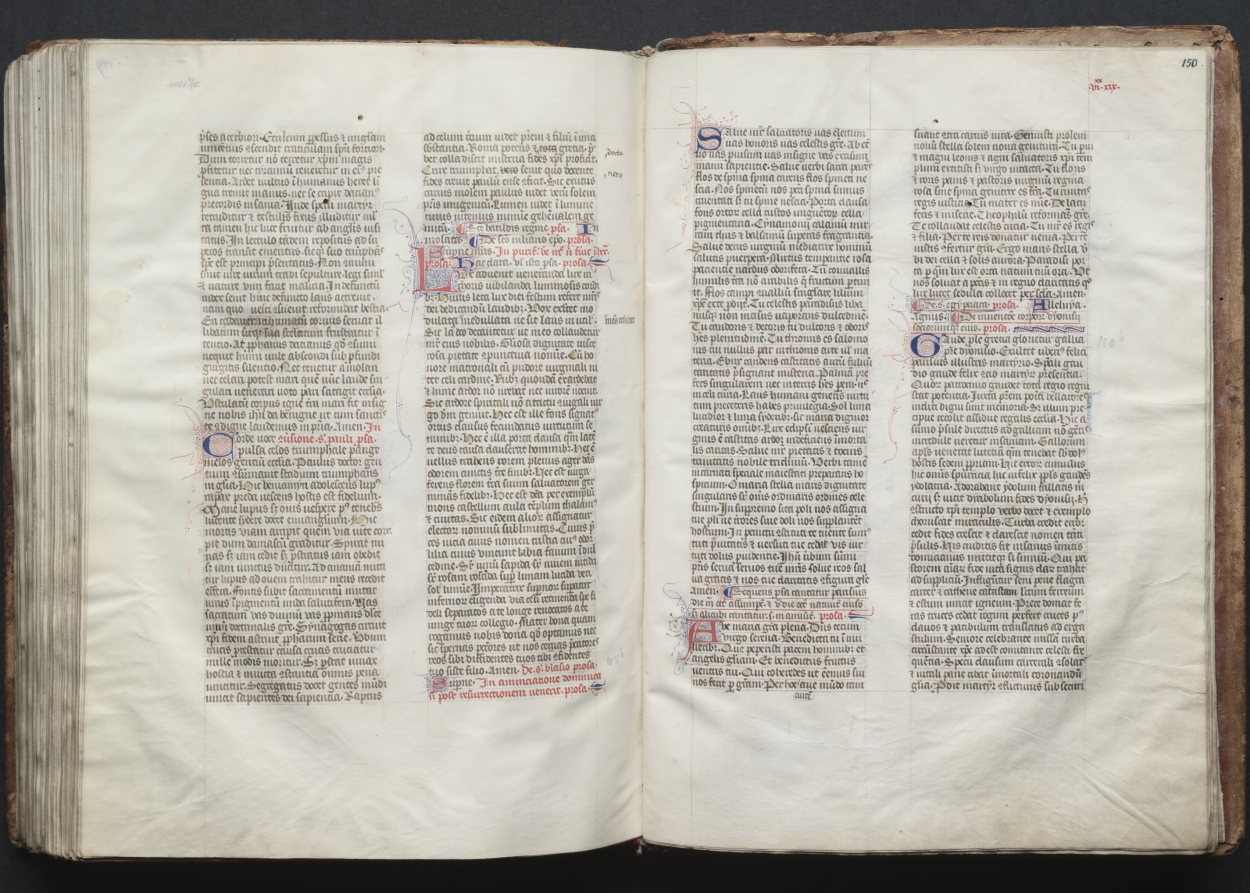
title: The Gotha Missal: Fol. 150r, Text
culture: France, Paris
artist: Master of the Boqueteaux (French)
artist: and Workshop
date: c. 1375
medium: ink, tempera, and gold on vellum; blind-tooled leather binding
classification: Bound Volume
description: The style and quality of this manuscript's decoration is typical of deluxe Parisian books made for aristocratic or royal patrons. Most of the book's decoration appears to be the work of the Master of the Boqueteaux, an artist active at the court of King Charles V (died 1380). His style was apparently shared by a number of book illuminators working in and around Paris. It is very possible that the Gotha Missal belonged to Charles V, but is not provable because the manuscript has no royal portraits and lacks a colophon. Given the book's magnificent decoration, however, it would seem that it was produced for a Valois prince, if not for the king himself. The manuscript receives its name from the German dukes of Gotha, its later owners.